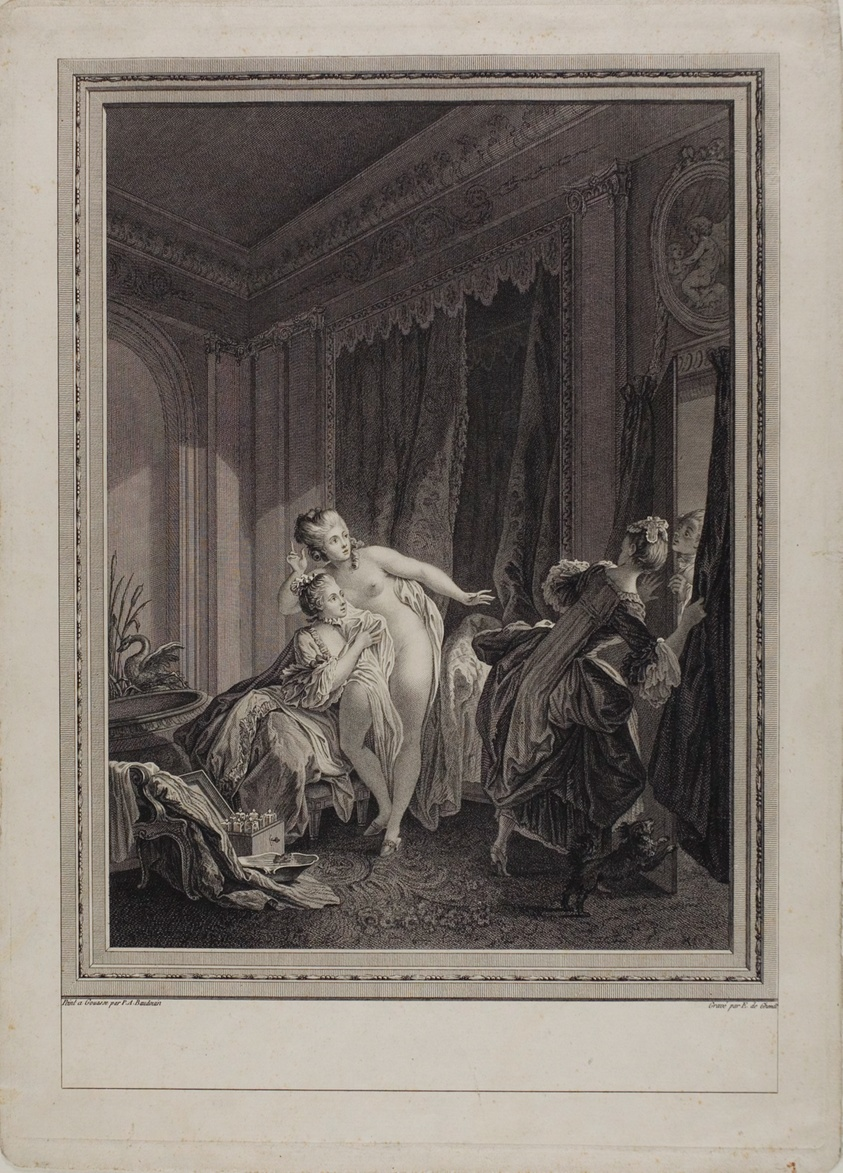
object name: Print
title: Evening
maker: Emmanuel Jean Nepomucene de Ghendt (French, 1738-1815); after Pierre Antoine Baudouin (French, 1723-1769)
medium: Etching on paper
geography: France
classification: etching; print; prints and drawing